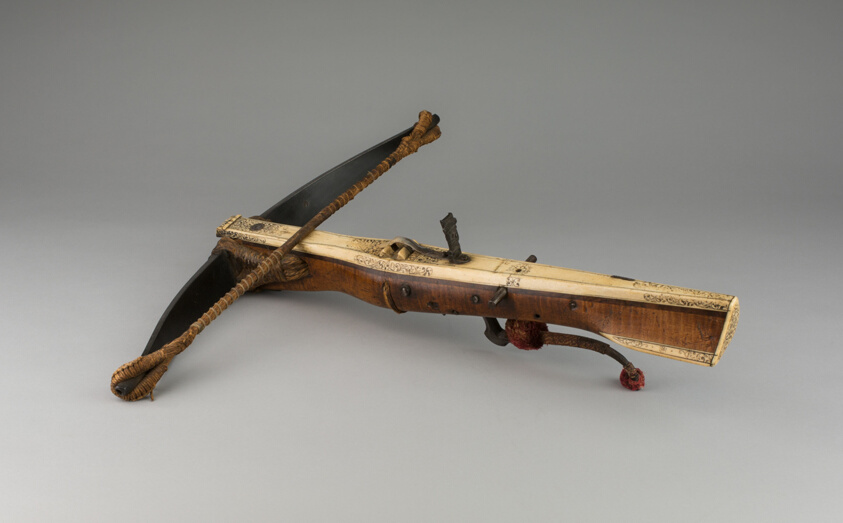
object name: Arms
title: Crossbow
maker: German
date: late 17th century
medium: Wood, steel, staghorn, cord, and silk fiber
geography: Germany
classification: crossbow; arms; arms and armor